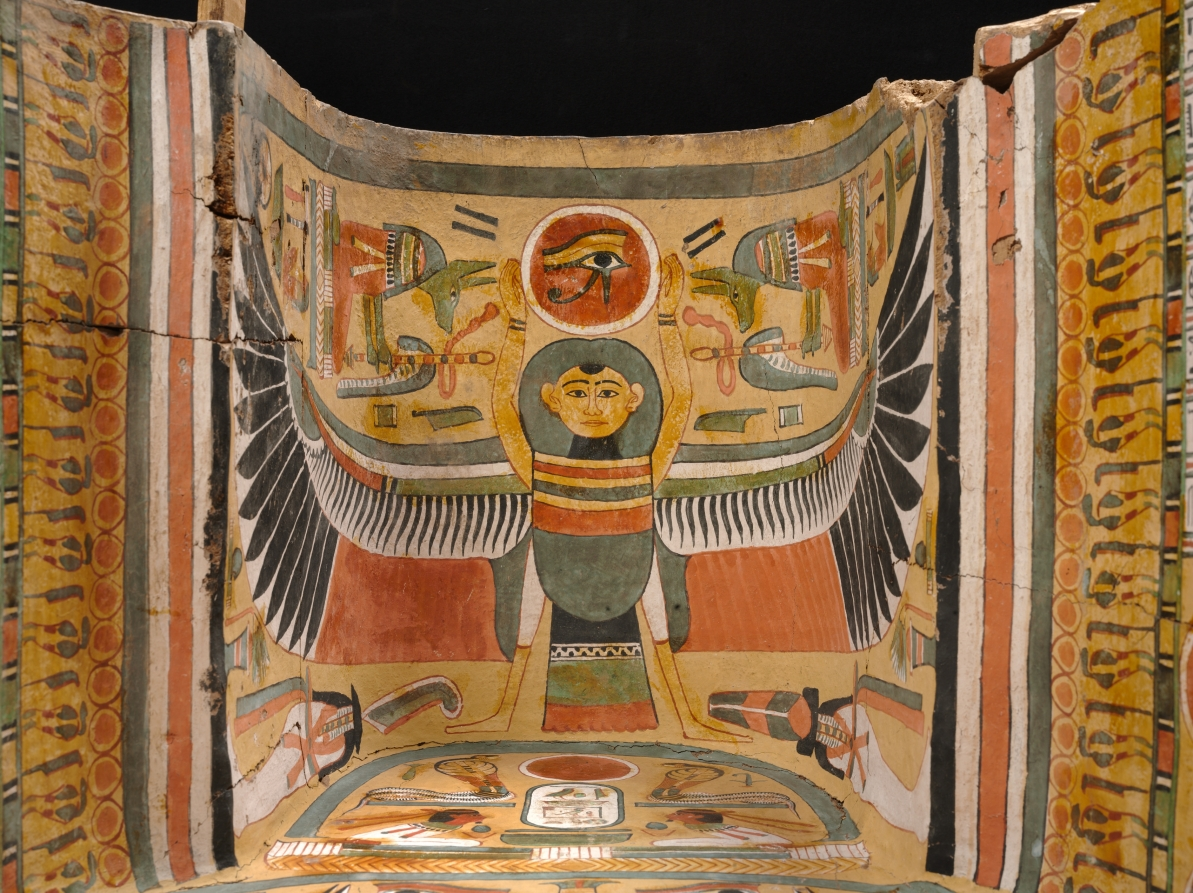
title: Coffin of Nesykhonsu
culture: Egypt, Thebes, Third Intermediate (1069–715 BCE), Dynasties 21–22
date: c. 976–889 BCE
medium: gessoed and painted sycamore fig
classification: Funerary Equipment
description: Egyptian coffins told stories and illustrated spells to help the deceased transition safely to the afterlife. Inside Nesykhonsu's coffin there are two jackals, one facing right and the other left, near the top. Here, the jackal represents the powerful deity Anubis, the god of the afterlife and embalming.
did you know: Two of Nesykhonsu's titles, "Lady of the House" and "Singer of the Choir of Mut the Great," are written on the outside of the coffin.